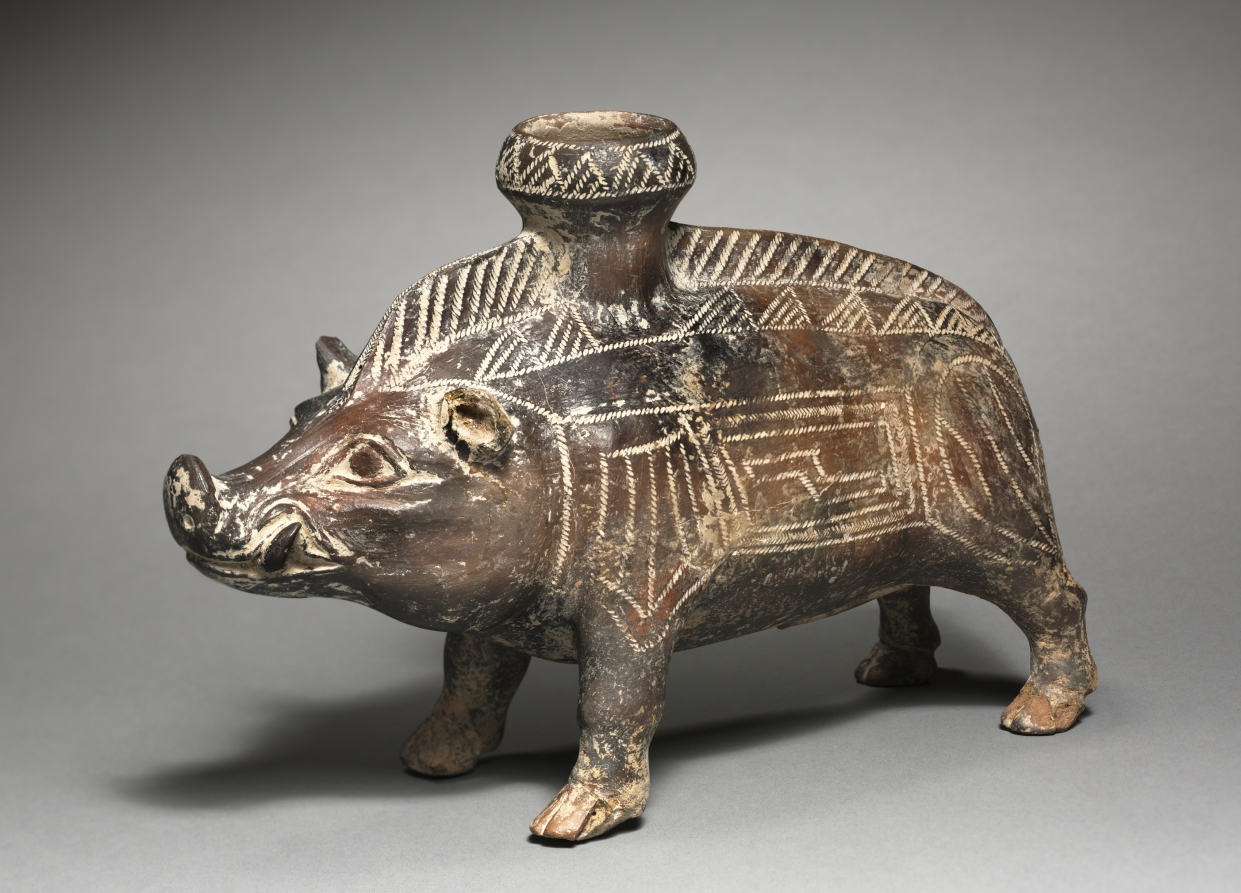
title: Vessel in the Shape of a Wild Boar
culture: Italy, Etruscan or modern forgery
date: 700–500 BCE or 1900s CE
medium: terracotta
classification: Ceramic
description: Wild boars were a favorite motif in classical antiquity, but this vessel has long puzzled scholars. Its brown, burnished surface, with incised geometric decoration, recalls Etruscan impasto pottery from as early as the seventh century BC. The naturalistic shape of the boar, however, resembles terracotta vessels made in the fifth century BC or later. Recent scientific analysis suggests that this vessel may have been made in the 20th century, and our curators and conservators are continuing their research.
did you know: This boar enjoyed brief internet fame, with a series of online memes peaking in 2018.